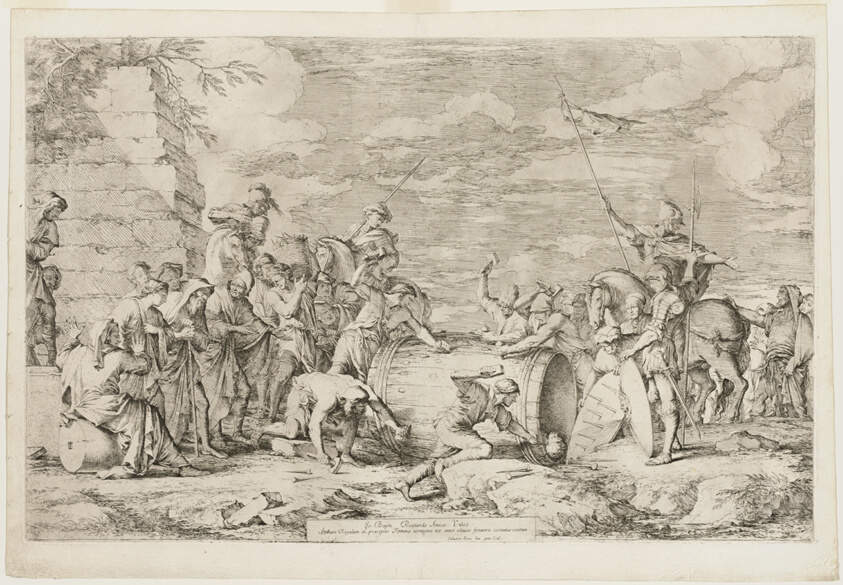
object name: Print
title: Death of Atilius Regulus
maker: Salvator Rosa (Italian, 1615-1673)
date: 1662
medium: Etching with drypoint on thick ivory laid paper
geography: Italy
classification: etching; print; prints and drawing